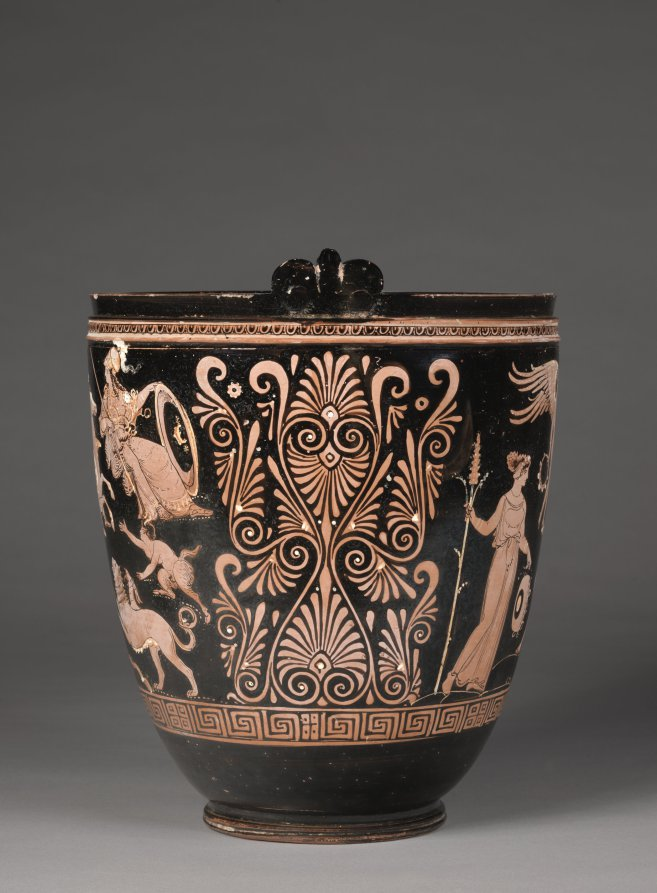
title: Red-Figure Situla (Deep Bucket): Bellerophon Slaying Chimaera (A); Dionysos, Maenads, Eros (B)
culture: South Italian, Apulian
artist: attributed to Group of the Dublin Situlae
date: c. 350 BCE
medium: ceramic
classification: Ceramic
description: The dramatic scene on this bucket-like vessel (known as a situla, more common in bronze) shows the hero Bellerophon astride his winged horse Pegasos, taking aim with a spear at the monstrous Chimaera. Combining parts of a goat and snake with the body of a lion, this fearsome fire-breathing creature lived in Lycia (now southwest Turkey), where fire still burns from natural vents in the rock. Also present on the vase are Hermes and Athena, watching Bellerophon, as well as a small Pan and two young satyrs with stones. Are they taking aim at Pegasos or the Chimaera? Dionysos, Eros, and two maenads appear on the reverse.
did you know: The mythical fire-breathing Chimaera comprises a lion with goat’s head and neck, plus a snake-headed tail.